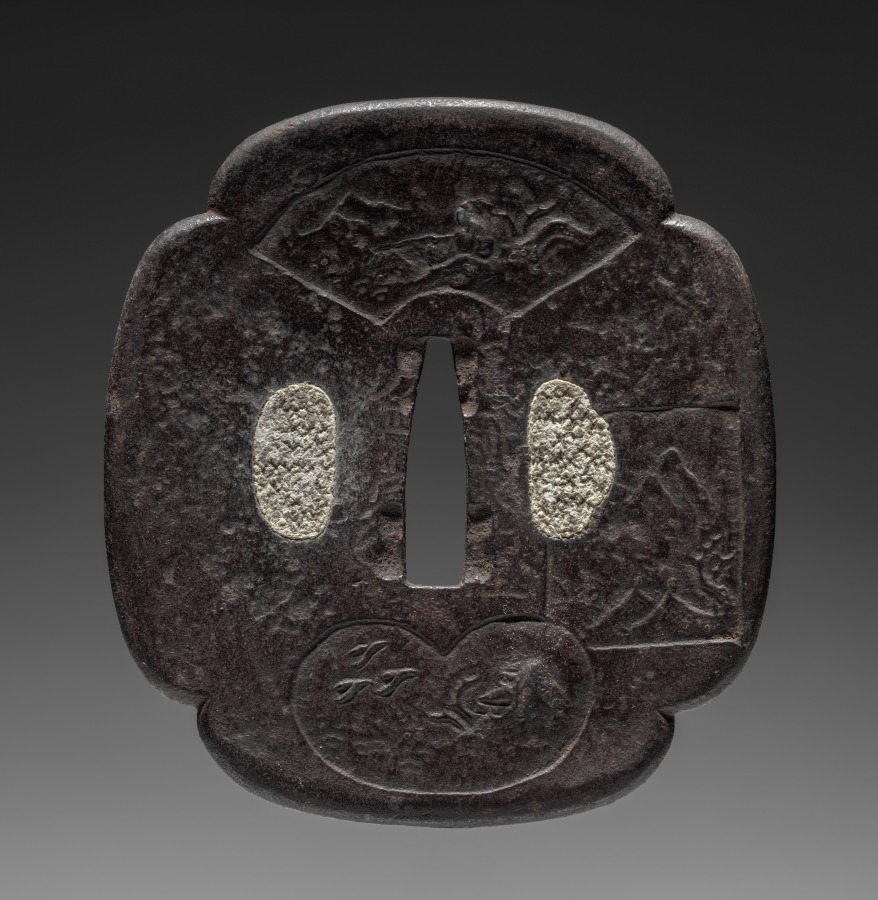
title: Sword Guard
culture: Japan, Edo period (1615–1868)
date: late 1600s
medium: iron (Kaneie type)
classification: Arms and Armor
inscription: signed "Kaneiye, residing at Fushimi."